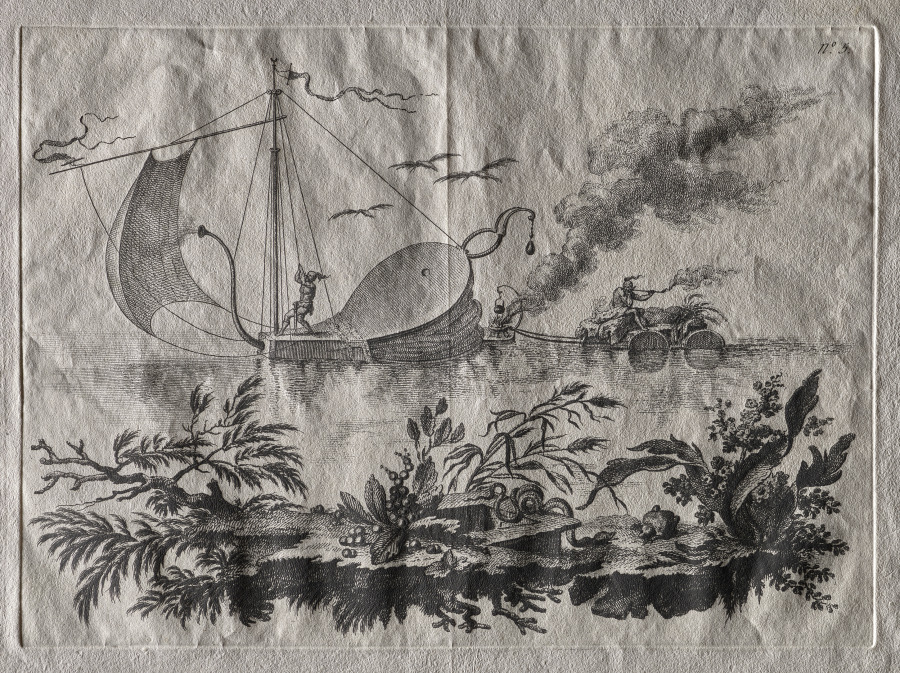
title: The Manner of Transporting Wares on Barges Drawn by a Bellows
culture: Italy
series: Suite of the Most Notable Things Seen by John Wilkins Erudite English Bishop during His Famous Voyage from the Earth to the Moon … dedicated to Sir William Hamilton ambassador to the Court of Naples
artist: Filippo Morghen (Italian, 1730–after 1807)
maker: possibly after Jean-Pierre-Louis-Laurent Hoüel (French, 1735–1813)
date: about 1769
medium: etching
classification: Print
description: Filippo Morghen’s set of 10 etchings is outstanding among visual narratives of imaginary voyages to the moon, both visual and literary, that intrigued 18th-century European audiences. A title page and nine plates depict the imagined lives and economy of moon dwellers. These include modes of transport such as large birds and sailboats propelled by giant bellows, enormous scissors for capturing wild beasts (including an oversized rat), and the use of giant pumpkins as fishing boats and as dwellings. Representations of the moon dwellers are based on inaccurate and imaginary European interpretations of Asian, Ottoman, and Native American cultures—called chinoiserie and turquerie—that permeated the decorative and visual arts of the period.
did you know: Morghen based this print series on three books dedicated to moon exploration, including Bishop Francis Godwin’s The Man in the Moone (1640).